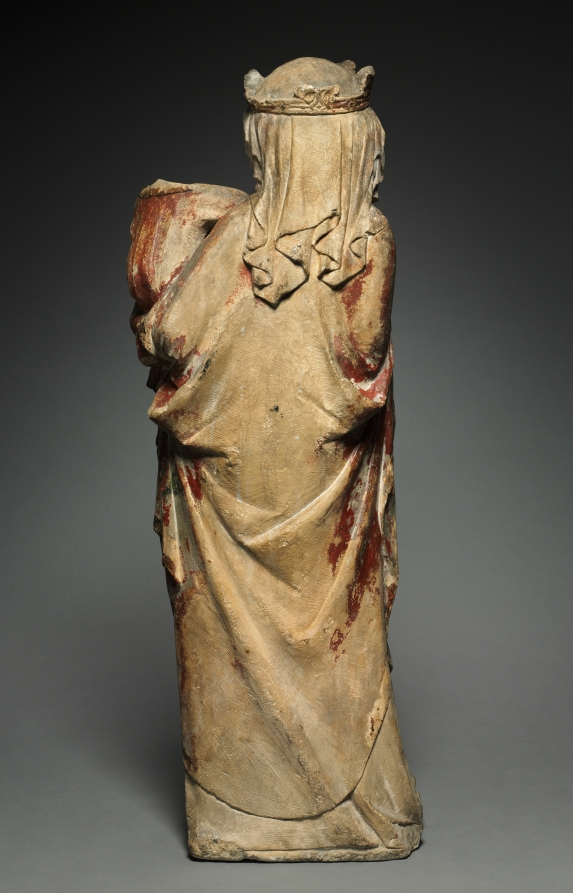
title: Virgin and Child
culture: France, Lorraine, 14th century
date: c. 1315–20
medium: limestone with traces of polychromy and gilding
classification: Sculpture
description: This graceful Virgin and child is a beautiful example from a large number of such figures produced in Lorraine, in eastern France, during the early 1300s. Lorraine at the time had a well-established artistic tradition and was under the rule of the Counts of Bar with established cultural links to both Flanders and England. Many of the surviving Lorraine Virgins share common characteristics consistent with this example--the swaying posture, with the weight of the Virgin placed on the left foot; and an open mantle with an exposed belted gown, the girdle itself trailing to the ground and ornamented with rosettes. Such standing figures were likely made for use in parish churches, cathedrals, aristocratic oratories, and monastic chapels, and attest to the intense veneration rendered to the Virgin during the period.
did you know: The CMA has a rare example of a similar woman’s belt (1930.742).